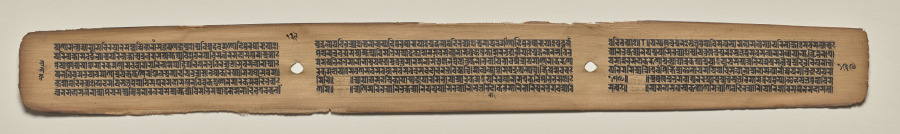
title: Text, Folio 139 (verso), from a Manuscript of the Perfection of Wisdom in Eight Thousand Lines (Ashtasahasrika Prajnaparamita-sutra)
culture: Eastern India, Bihar, Vikramashila Monastery. Painting: Nepal, Kathmandu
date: Sunday, September 14, 1119 (year 239 of the Newar Samvat in the month of Ashvina)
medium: gum tempera and ink on palm leaves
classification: Painting